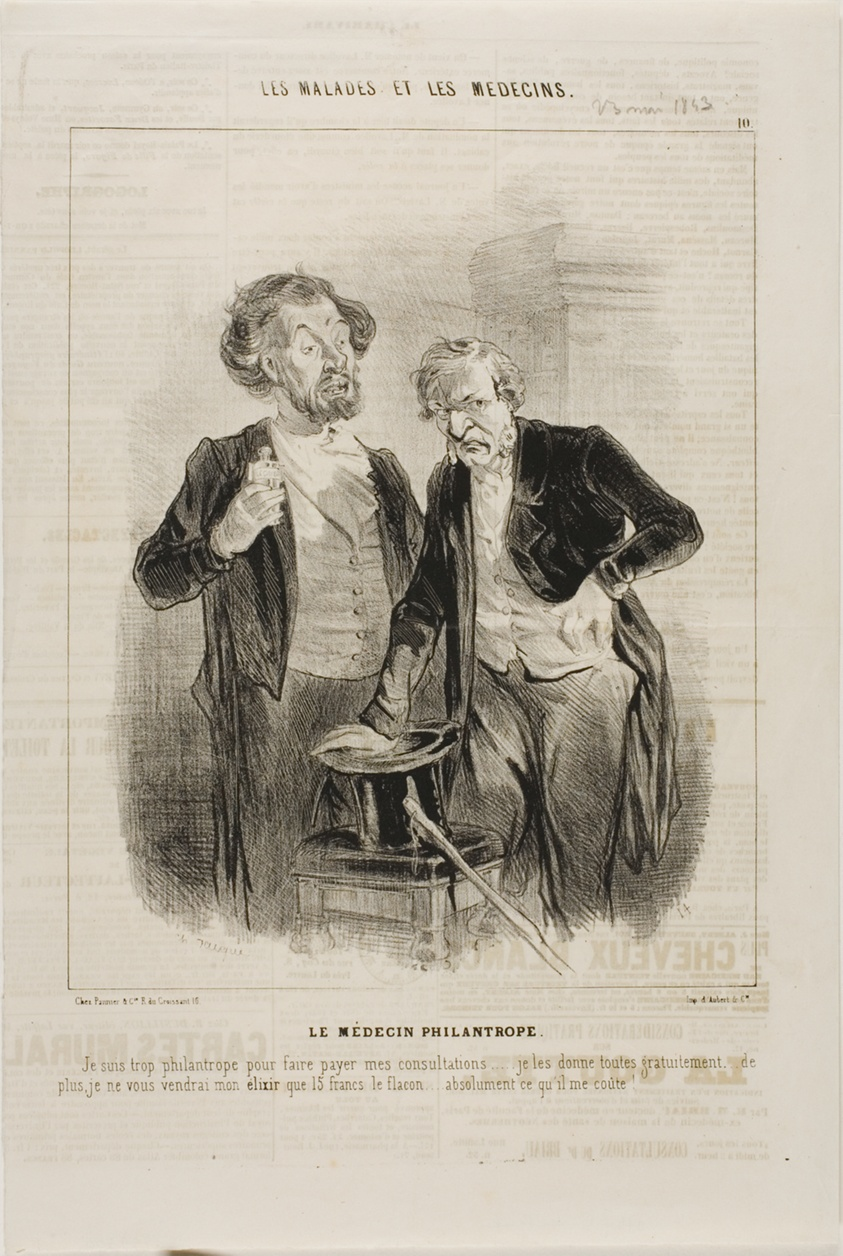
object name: Print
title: The Philanthropic Doctor (plate 10)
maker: Charles Émile Jacque (French, 1813-1894)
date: 1843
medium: Lithograph in black on ivory wove paper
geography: France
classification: lithograph; print; prints and drawing